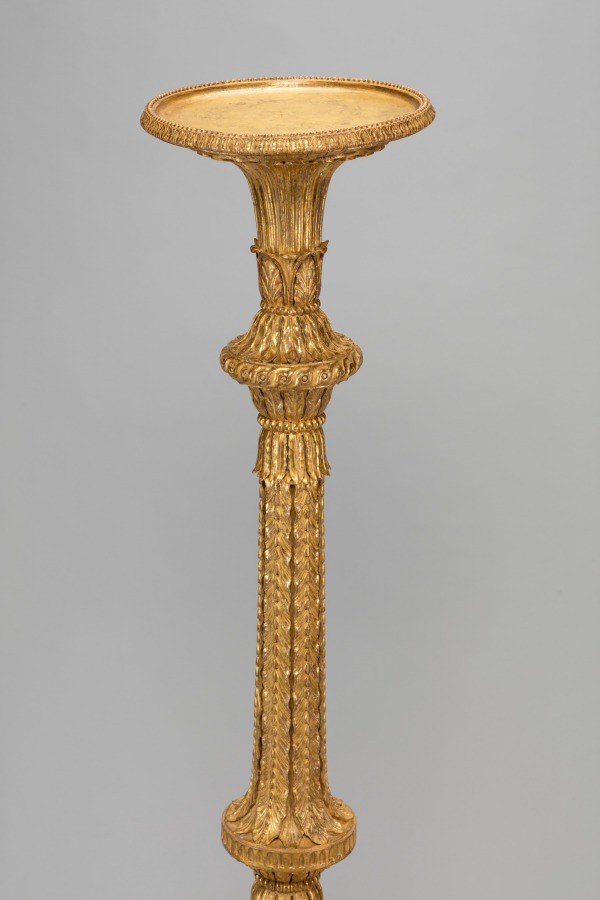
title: Candle Stand (torchère) (2 of 2)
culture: England, 18th century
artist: Thomas Chippendale (British, 1718–1779)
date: c. 1773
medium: Gilt-wood, gesso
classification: Furniture and woodwork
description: This gilded candle stand was made by Thomas Chippendale, the most renowned cabinetmaker in eighteenth-century London, for the grand drawing room of Brocket Hall, a large country house in Hertfordshire, England. With finely carved acanthus leaves, swags, fluting, and oval masks depicting the Roman goddess Diana, this candle stand exhibits Chippendale’s masterful understanding of neoclassical proportion, scale, and ornament. His landmark book of furniture designs, The Gentleman and Cabinet-Maker’s Director (first published in 1754), was highly admired as a source of inspiration by cabinetmakers and architects around England as well as in Europe and America.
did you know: Candle stands usually held silver or crystal candelabra that were lit for evening entertainment.